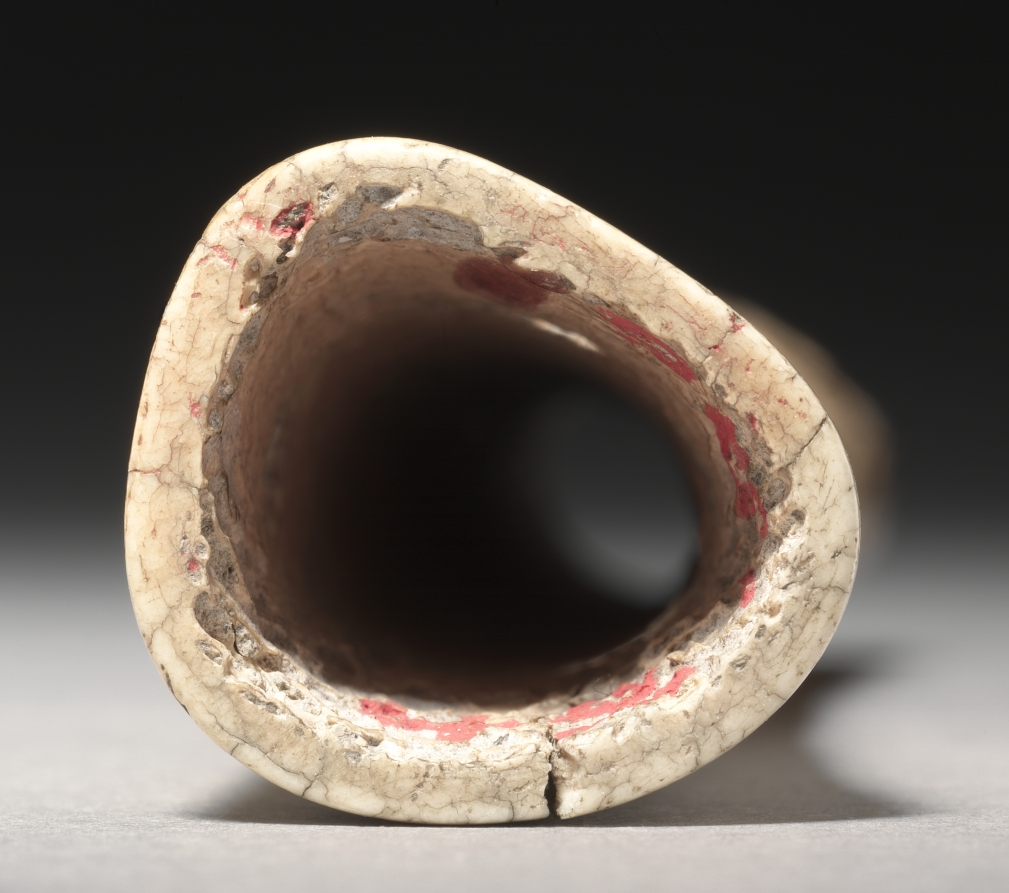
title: Carved Tube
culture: Mexico, Oaxaca, Mixtec, 13th-16th century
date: c. 1200–1519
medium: bone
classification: Jewelry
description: Carved in spiral registers, the ornamentation on this bone tube resembles Mixtec painting, both in codices (screenfold books) and architectural murals.